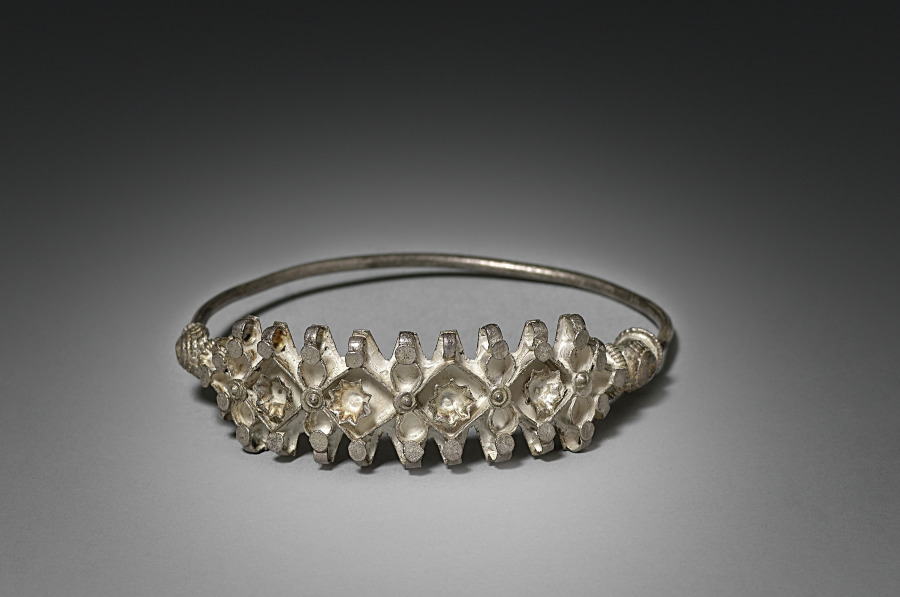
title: Nose Ring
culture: India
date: early 1900s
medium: silver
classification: Jewelry